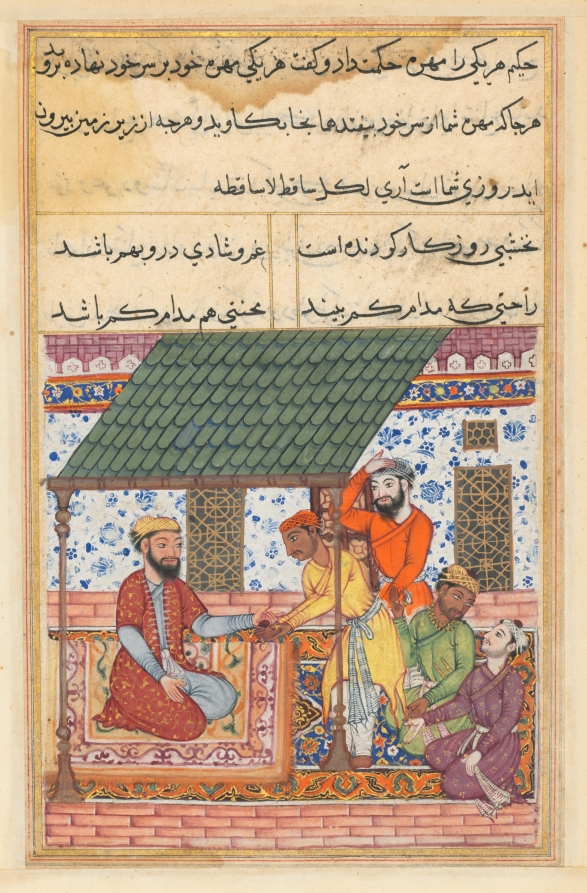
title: The four destitute friends go to a wise man who gives each one of them a magic shell to be placed on top of the turban, from a Tuti-nama (Tales of a Parrot): Forty-seventh Night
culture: Mughal India, court of Akbar (reigned 1556–1605)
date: c. 1560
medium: gum tempera, ink, and gold on paper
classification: Painting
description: The seated wise man drops a small, red shell into the final friend’s outstretched hands. He then instructs each of them to go out into the world and walk until the shell falls to the ground. If the man digs where the shell lands, he will find something to sustain him.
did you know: This story takes place in Balkh, a city in northern Afghanistan.